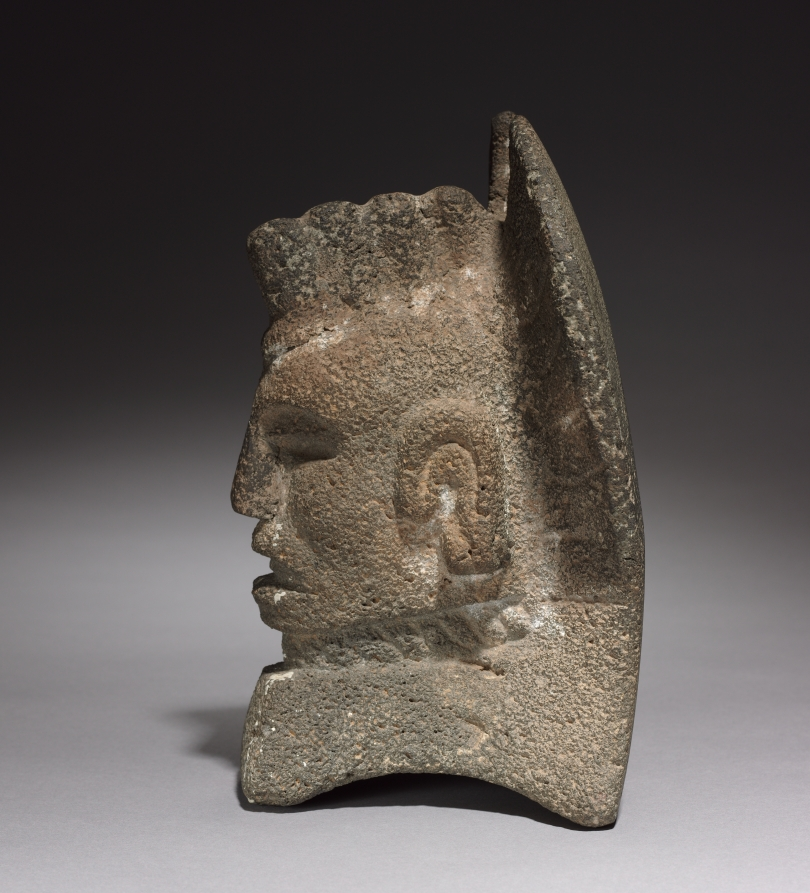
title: Head Palma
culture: Mexico, Veracruz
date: 600–1000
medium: gray volcanic stone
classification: Sculpture